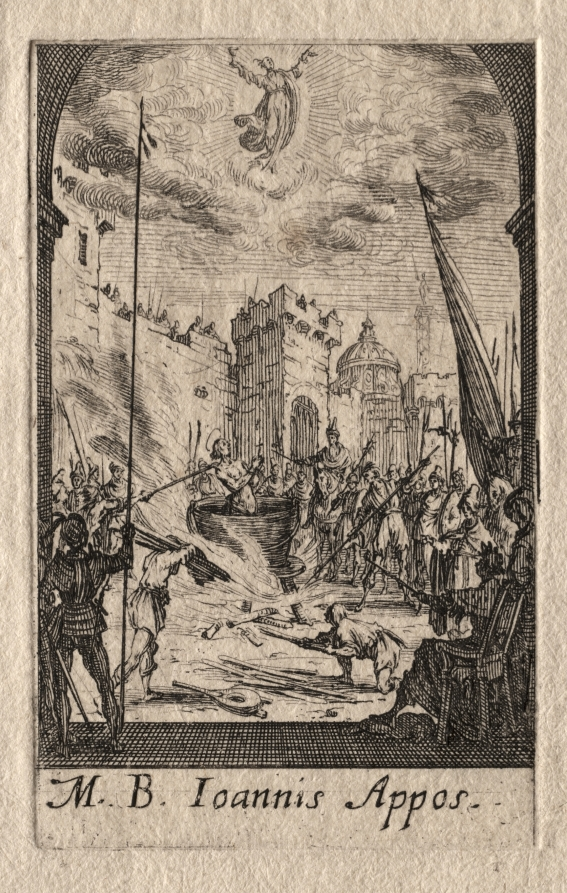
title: The Martyrdom of the Apostles: St. John the Evangelist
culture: France, 17th century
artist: Jacques Callot (French, 1592–1635)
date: ca. 1632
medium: etching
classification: Print